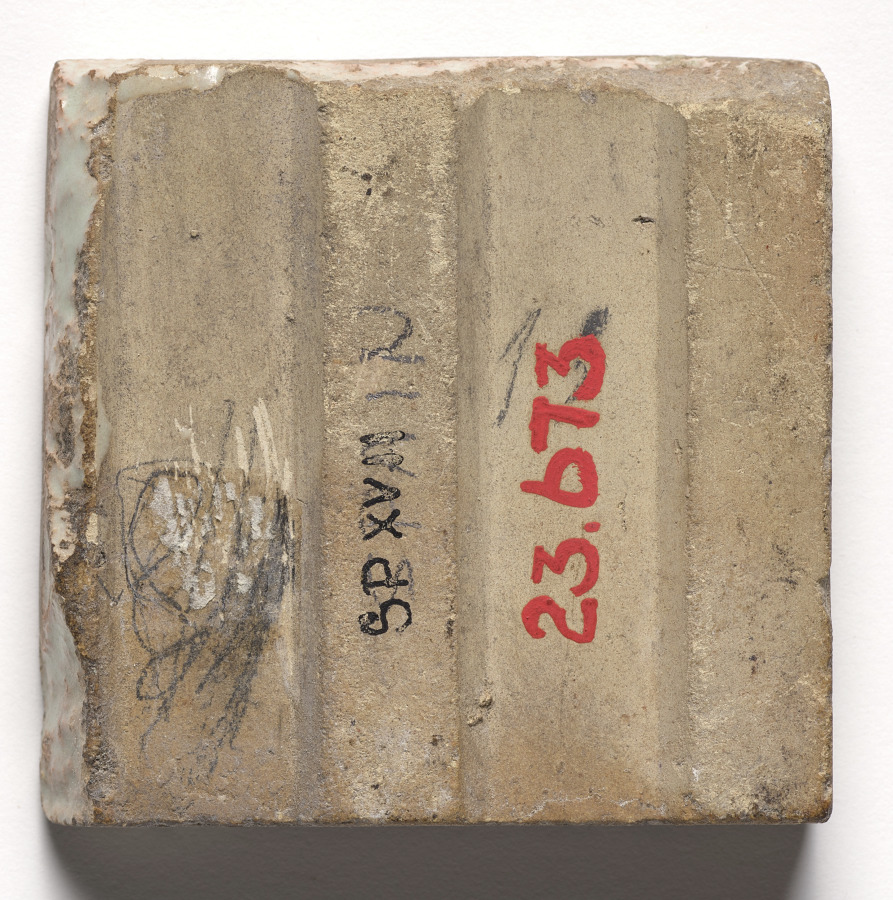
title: Wall Tile–Leaping Animal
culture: Spain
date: c. 1600s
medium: glazed ceramic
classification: Ceramic